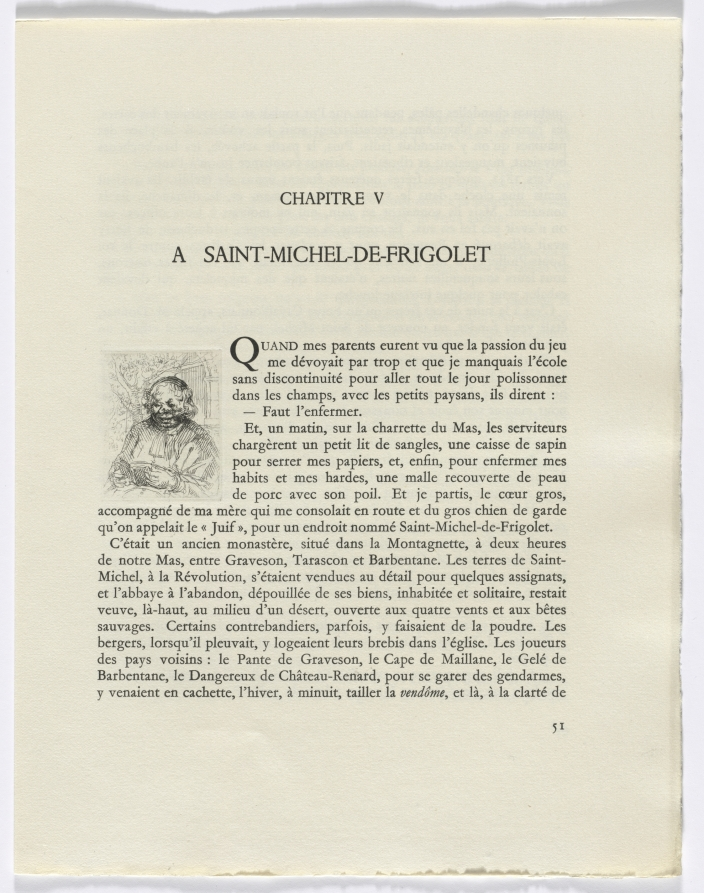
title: Frédéric Mistral: Mémoires et Recits by Frédéric Mistral: bust of a man (page 51)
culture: France, 20th century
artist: Auguste Brouet (French, 1872–1941)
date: 1937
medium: etchings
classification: Portfolio